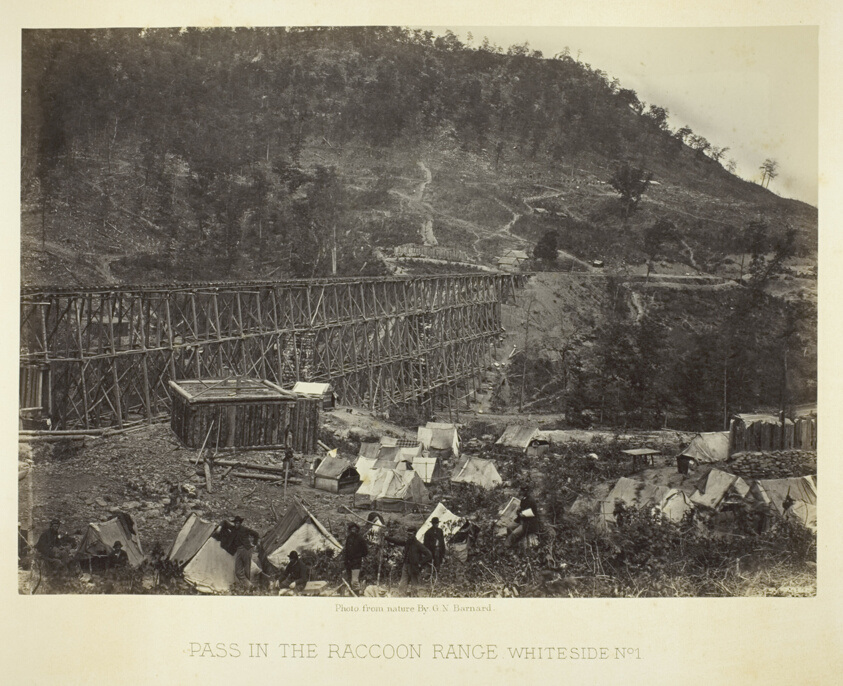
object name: Photograph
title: Pass in the Raccoon Range, Whiteside No. 1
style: 19th century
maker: George N. Barnard (American, 1819–1902)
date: 1864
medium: Albumen print, plate 6 from the album "Photographic Views of the Sherman Campaign" (1866)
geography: United States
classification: albumen silver print; photographic process; photography; photograph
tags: Collected by Hugh Edwards, Sherman's Campaign 1866, documentary